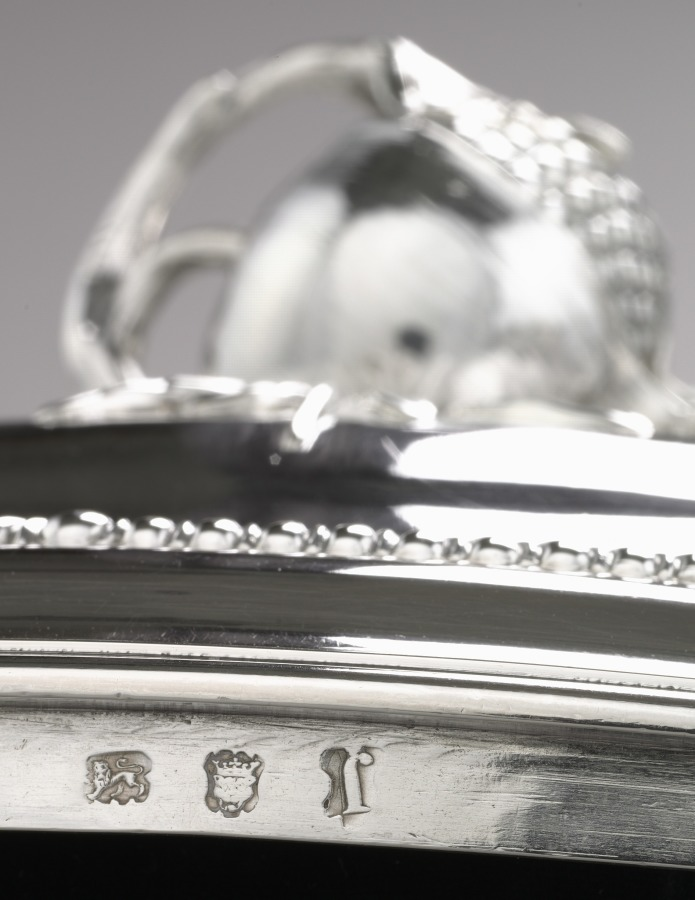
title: Covered Tureen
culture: England, 18th century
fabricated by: Edward Wakelin (British, 1784)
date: 1753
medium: silver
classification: Silver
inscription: engraved coat of arms of Admiral Edward Vernon of Nacton (1684-1757) and his wife Sarah, daughter of Thomas Best. Engraved on cover is Vernon crest, a woman holding a scythe.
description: A very successful silversmith, Edward Wakelin may have been more a businessman than a craftsman or designer.